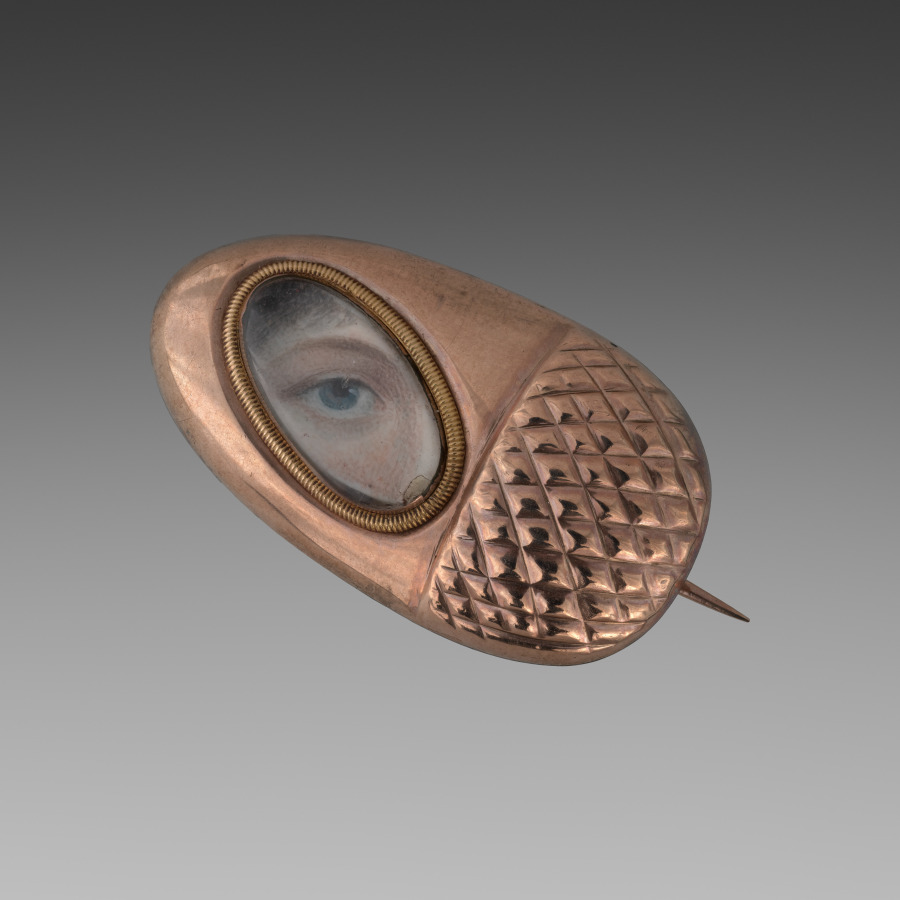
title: Eye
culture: America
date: 1900s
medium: watercolor on ivory set in an acorn-form brooch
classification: Portrait Miniature